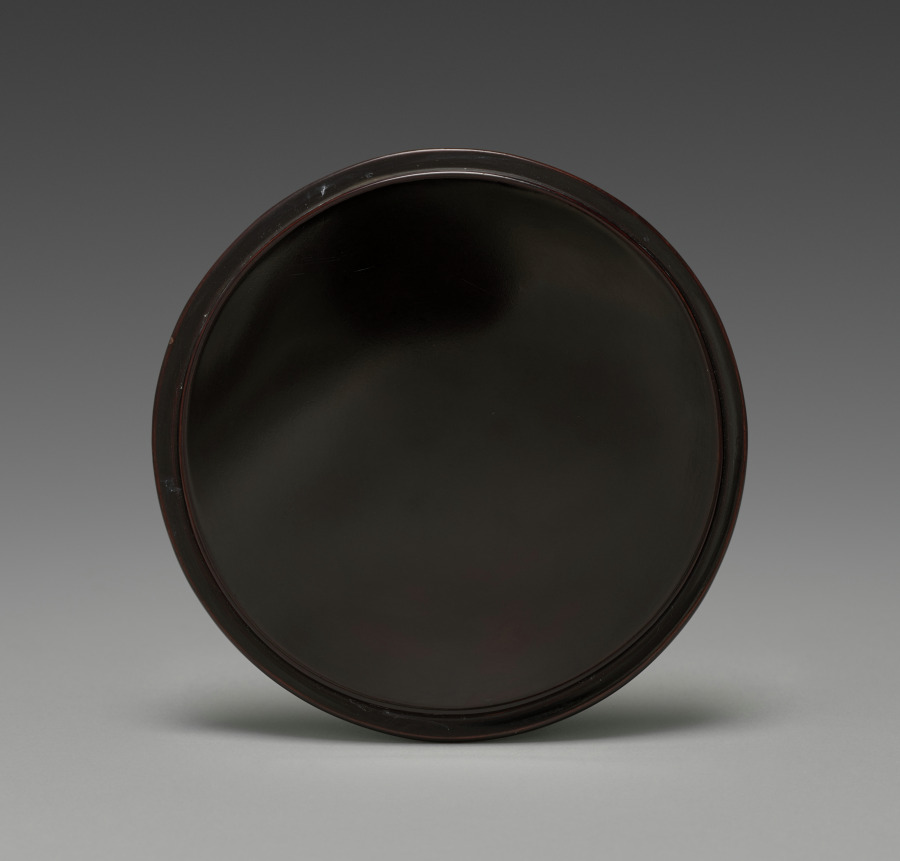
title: Lid for a Water Container with Peonies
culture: Japan, Meiji period (1868–1912)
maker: Seifū Yohei III (Japanese, 1851–1914)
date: 1900–1914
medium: Black lacquered wood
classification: Ceramic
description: This ceramic is an especially accomplished example of Yohei III’s combination of an all-over translucent colored glaze with molded and carved designs. It features the peony as its primary motif. The water container, or mizusashi, has a green glaze, and its design takes into consideration the rounded shape and the seated position of the host and guests. It begins low on the body with a flower just beginning to open and continues with another flower a bit higher up, with its petals fully extended and beginning to open outward. It finishes with a flower in full bloom, petals and leaves unfurled and spread outward from the center, now occupying almost the entire surface. The water container once belonged to the Hosokawa family, whose go-between corresponded with Yohei IV about the piece. Yohei IV thanked them for their payment and requested that despite his father’s death in the previous year, they continue to favor the studio with their orders. The letter and its envelope, as well as an auction tag, remain with the object.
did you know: Yohei IV wrote an inscription on the reverse of the inner box lid authenticating the work as one made by his father.